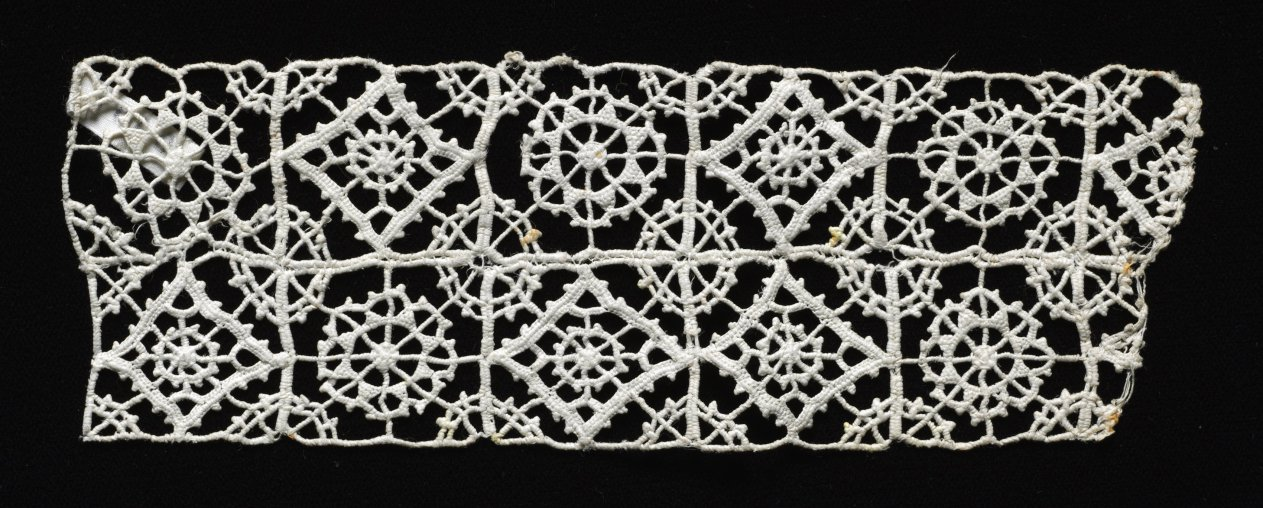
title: Lace Fragment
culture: Italy, Venice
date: 1500s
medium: Linen: needle lace (reticella) insertion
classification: Lace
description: This fragment consists of two narrow bands, nearly identical, stitched together.